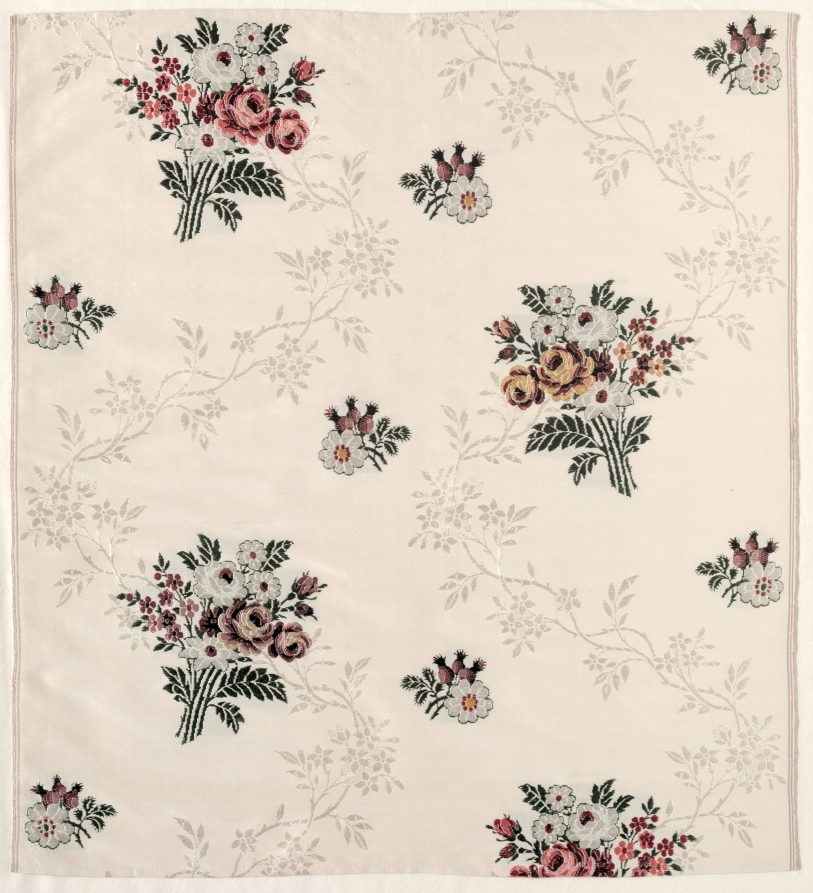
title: Strip of Brocade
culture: England, Spitalfields, late 18th century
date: late 1700s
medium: silk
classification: Textile